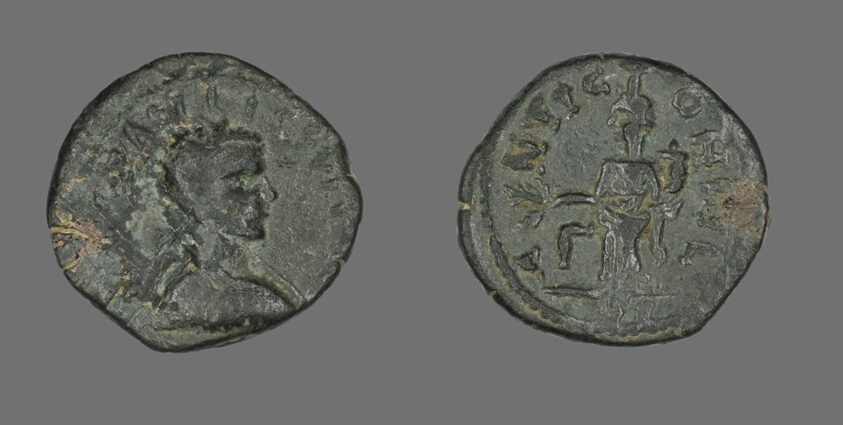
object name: Coin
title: Coin Portraying an Emperor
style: greek, ancient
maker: Greek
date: end of 3rd century BCE (?)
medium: Bronze?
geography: Ancient Greece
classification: coin; ancient art